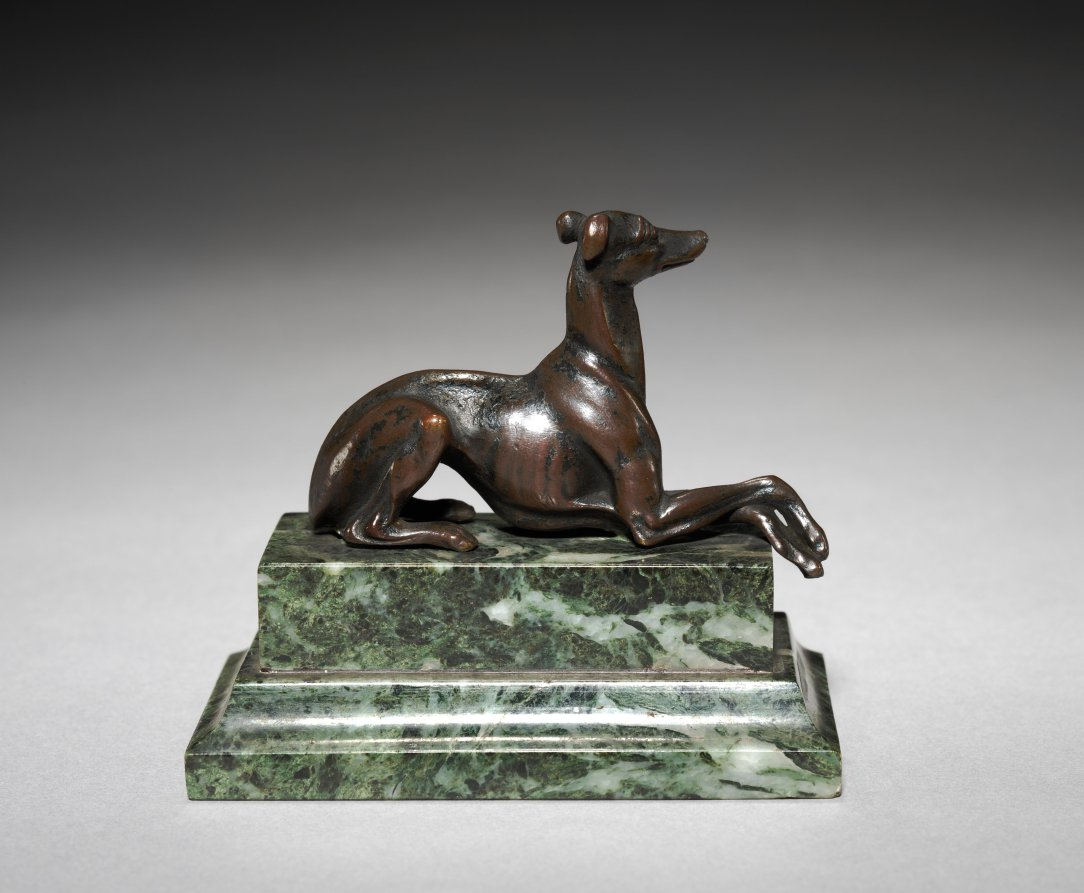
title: Whippet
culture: France, 19th century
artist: Pierre Jules Mène (French, 1810–1879)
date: c. 1825 – 1879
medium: bronze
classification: Sculpture